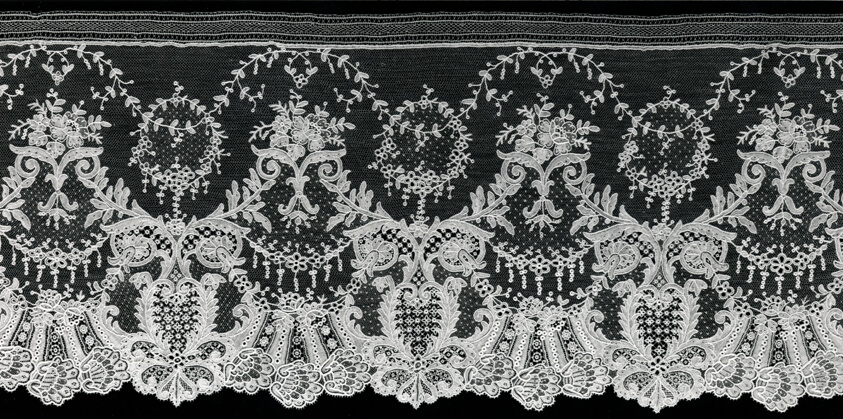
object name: Textile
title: Flounce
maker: Possibly made by Auguste Lefébure (French, born 1864); Belgium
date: 1860s/70s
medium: Cotton, needle lace of a type known as "Point de Gaze"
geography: Belgium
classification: textile; lace - needle